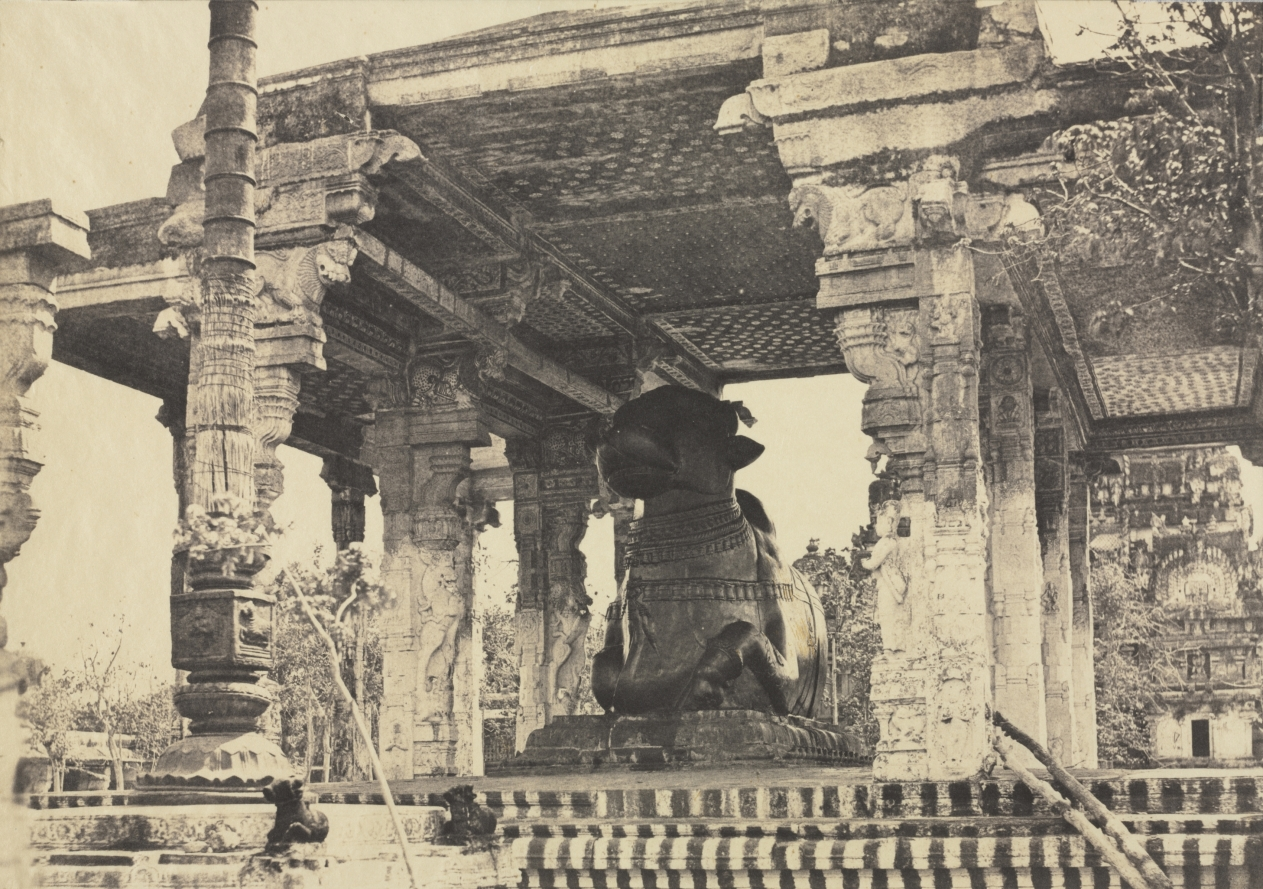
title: Great Pagoda, Great Bull, Front View, Tanjore, India (Rajarajeshvara Temple), plate 12 from Photographic Views of Tanjore and Trivady (Madras: Madras Presidency)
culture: England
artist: Captain Linnaeus Tripe (British, 1822–1902)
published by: Madras Presidency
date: 1857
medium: salted paper print from calotype negative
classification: Photograph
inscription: Written in pencil on verso: "The Great Bull of Tangore"; "IC25"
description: In a pillared pavilion called a mandapa, a colossal stone sculpture of Nandi, the mount of the Hindu god Shiva, faces the doorway to the main temple sanctum. The inner wall and section of the great gateway leading into the sacred site can be seen in the background of Tripe’s photograph. As an active Indian temple, the plinth, or base, of the pavilion is painted with alternating red and white stripes. Tripe, however, opted not to include any living presence in the image, since humans and animals might move and create a blur, spoiling his clear photographic record of the monument.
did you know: Active in Burma and India during the late 1850s, Linneaus Tripe was a professional soldier and official photographer for the Madras Presidency in India from 1856 to 1860.